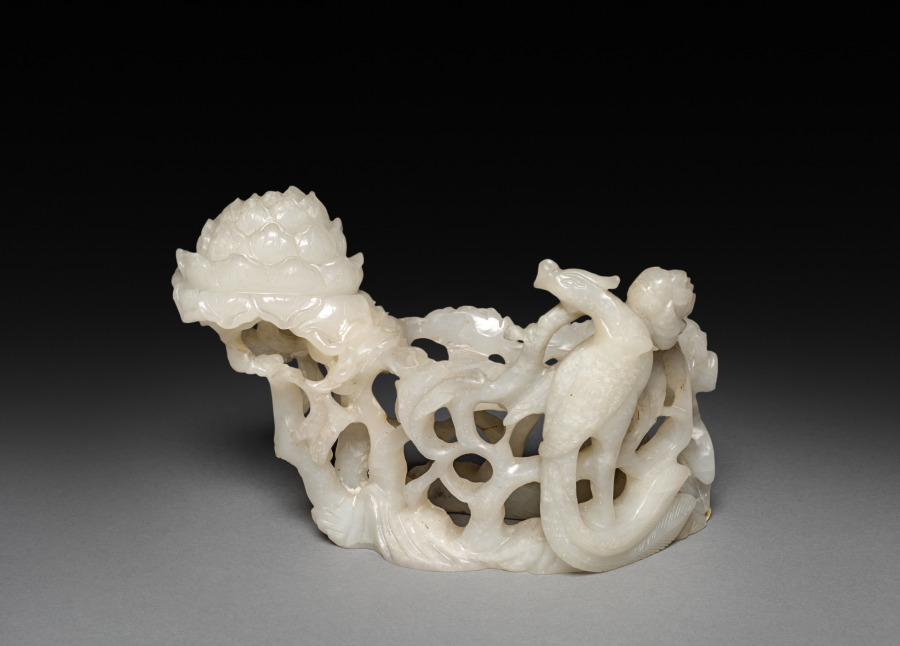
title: Three-Sectional Altar Group: Cylindrical Carving with Phoenix (base)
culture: China, Qing dynasty (1644-1911)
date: 1644–1911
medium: jade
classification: Jade